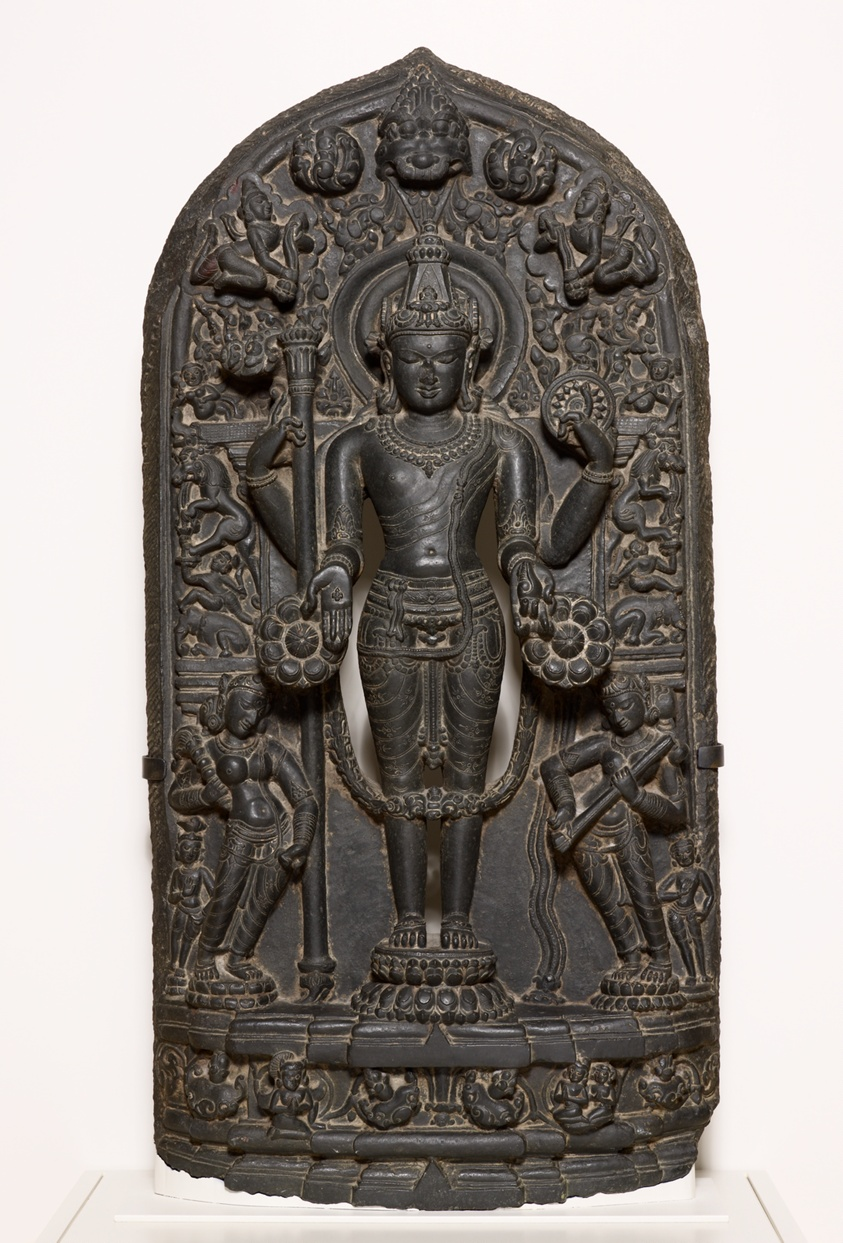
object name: Sculpture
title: God Vishnu with Goddesses Lakshmi and Sarasvati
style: South Asian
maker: Bangladesh or Eastern India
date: Pala period, 10th/12th century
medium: Basalt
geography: Bangladesh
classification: sculpture; stone (unidentified); stone; asian art